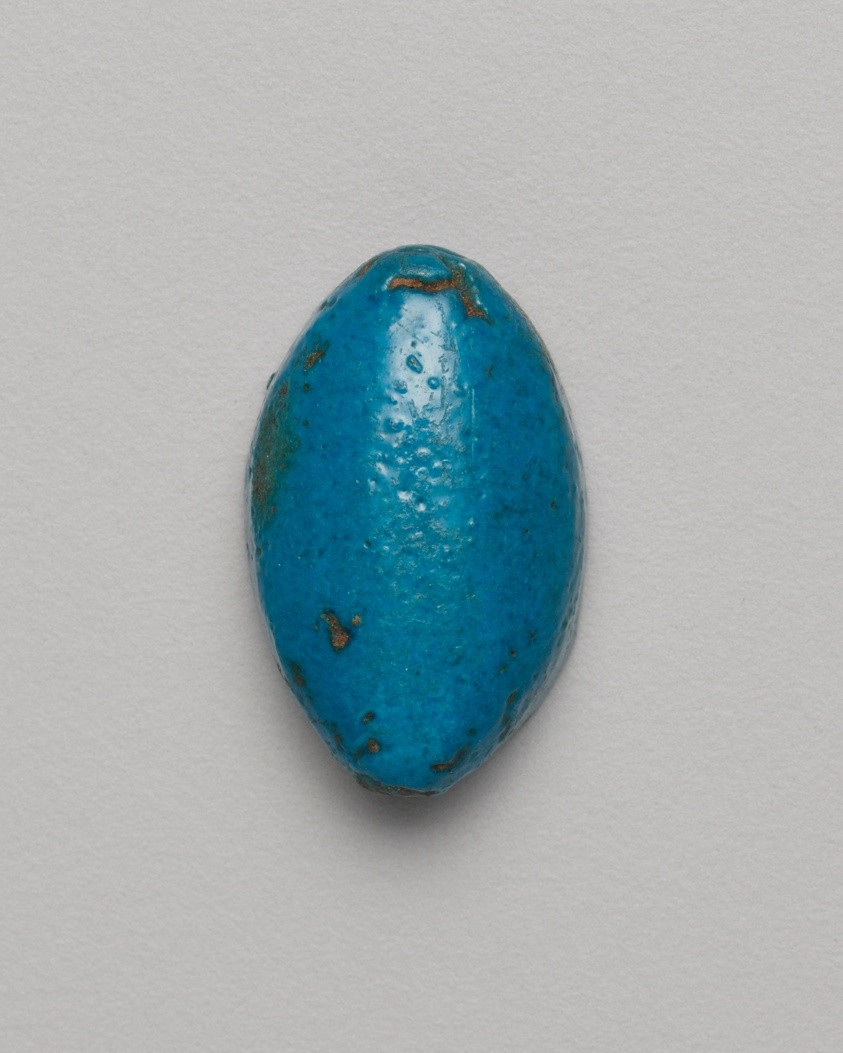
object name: Costume and Accessories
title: Cowroid: The King’s Wife, Tiye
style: new kingdom, ancient, eighteenth dynasty, egyptian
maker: Egyptian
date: New Kingdom, Dynasty 18, reign of Amenhotep III (about 1390–1352 BCE)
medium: Faience or steatite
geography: Egypt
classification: scaraboids; jewelry; amulet; ancient art; costume; faïence (composite material)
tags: Hieroglyphs, queens